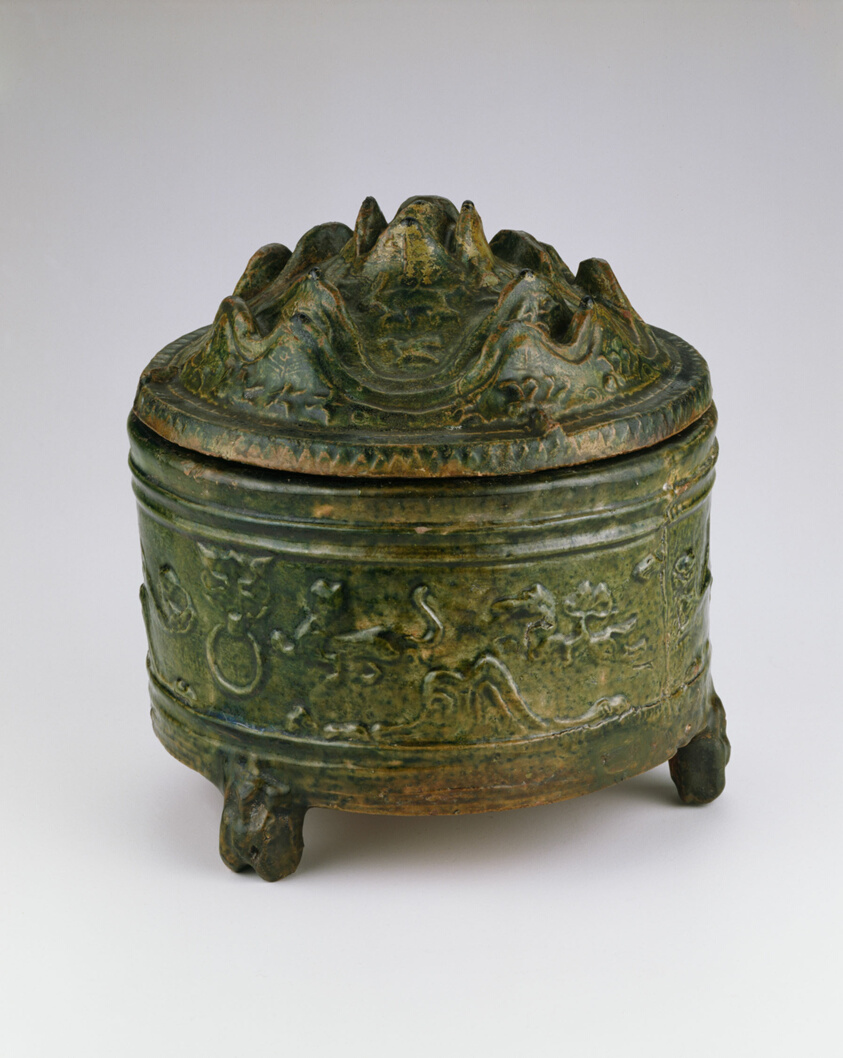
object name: Vessel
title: Cylindrical Jar with Three Bear-Shaped Feet and Mountain-Shaped Cover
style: Chinese (culture or style)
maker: China; probably Shaanxi province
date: Han dynasty, 206 BCE–220 CE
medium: Earthenware with molded relief decoration and lead glaze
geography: China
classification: ceramics; asian art; vessel